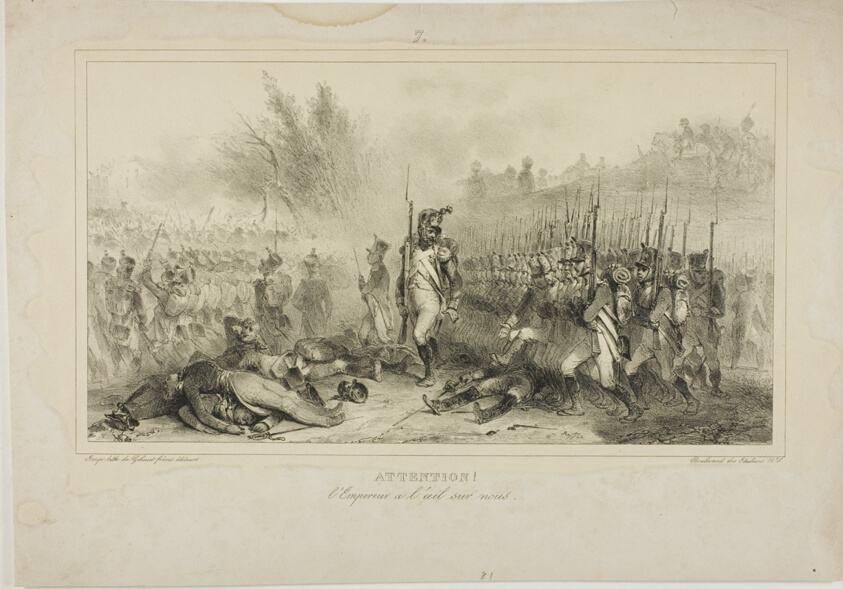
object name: Print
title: Attention! The Emperor has his eye on you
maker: Denis Auguste Marie Raffet (French, 1804-1860); published by Chez Gihaut Frères (French, 19th century)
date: 1832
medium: Lithograph in black on cream wove paper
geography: France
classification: lithograph; print; prints and drawing